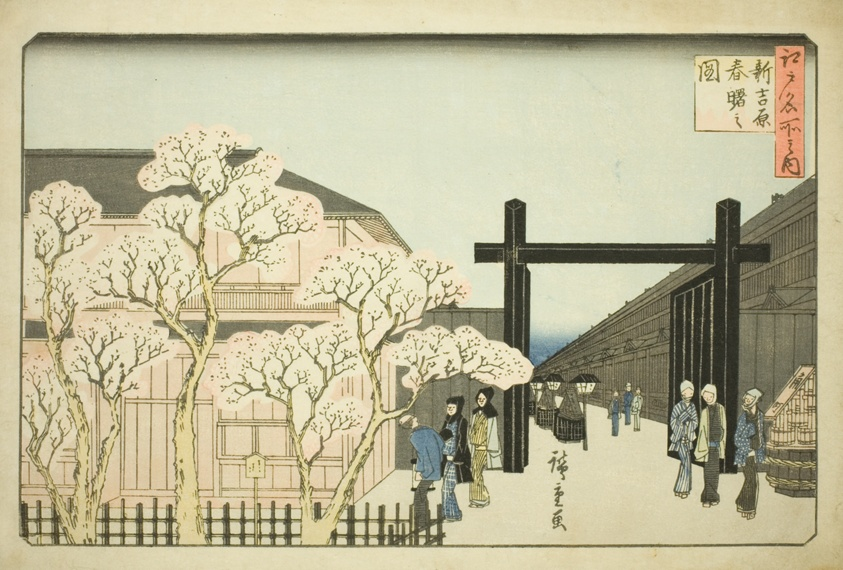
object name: Print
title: Spring Dawn in the New Yoshiwara (Shin Yoshiwara haru akebono no zu), from the series "Famous Places in Edo (Edo meisho no uchi)"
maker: Utagawa Hiroshige 歌川 広重; Japanese, 1797-1858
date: c. 1839/42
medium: Color woodblock print; oban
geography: Japan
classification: woodblock print; print; asian art